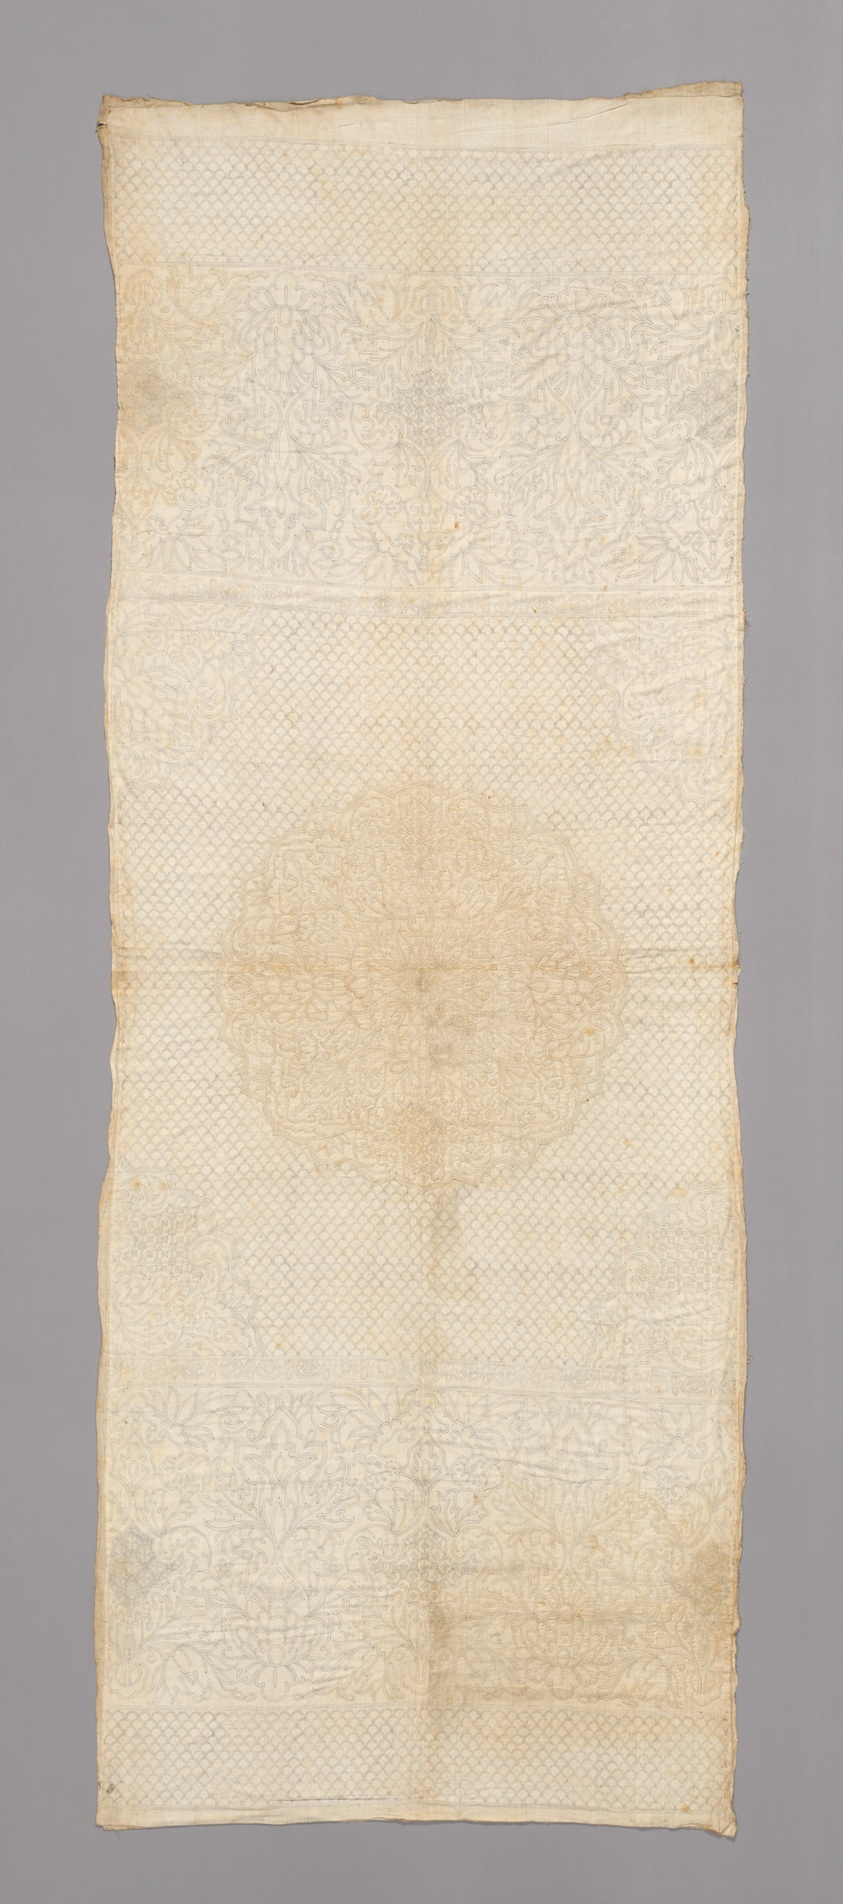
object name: Textile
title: Bedcover (Unfinished in Three Sections)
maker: France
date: 18th century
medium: Cotton, plain weave, quilted in parts, design stamped in ink, lined with cotton, plain weave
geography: France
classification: textile; needlework - quilt